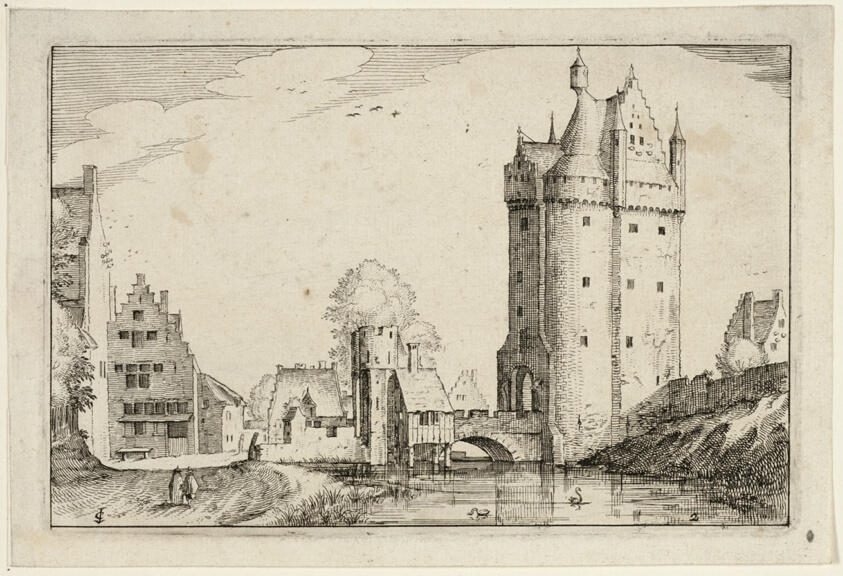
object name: Print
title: Town Gate, plate two after Pictures of Farms, Country Houses and Rustic Villages (Praediorum villarum et rusticarum casularum icones)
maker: Claes Jansz. Visscher (Dutch, 1587-1652); after Unknown Flemish Artist, misidentified as Pieter Bruegel, the elder (Flemish, 1525/30-1569)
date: 1612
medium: Etching in black on ivory laid paper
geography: Netherlands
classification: etching; print; prints and drawing